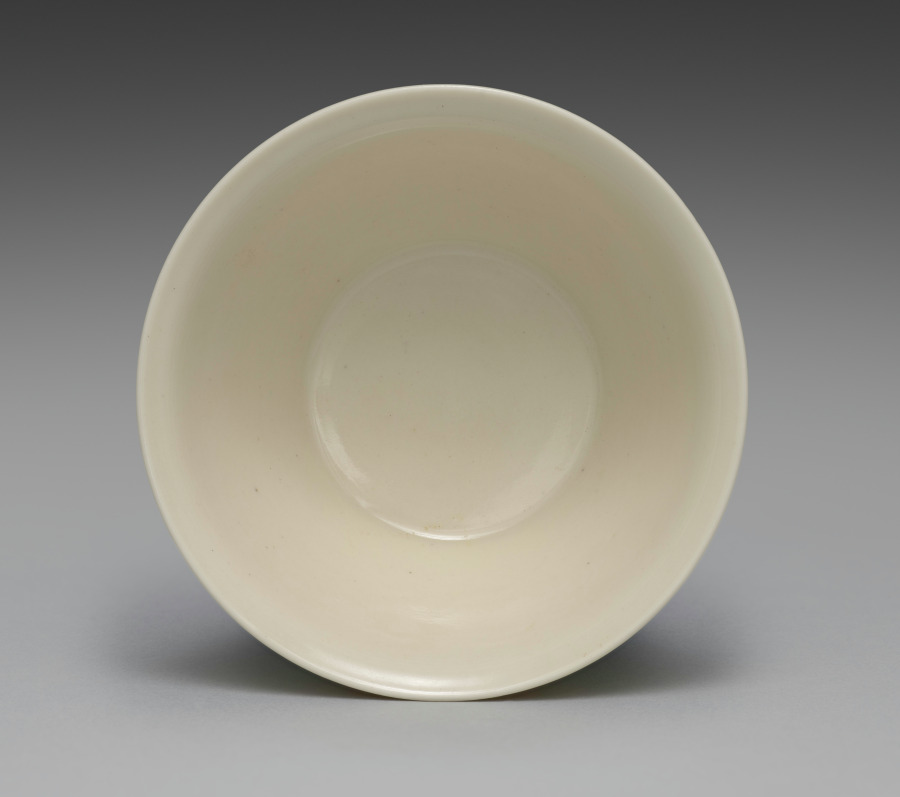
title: Teacup from Teacups with Floral Band Motif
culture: Japan, Meiji period (1868–1912)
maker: Seifū Yohei III (Japanese, 1851–1914)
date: 1893–1914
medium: One from a set of five cups; porcelain with incised decoration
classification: Ceramic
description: The five sencha teacups in this set are decorated with incised flowers and dots between a double band at the top and a single band at the bottom. They are in Yohei III’s creamy taihakuji body and glaze. In their motifs, they are quite similar to an incense burner by Yohei III (see CMA 2022.180), but the flowers are even more simple in design, with no open circle at the center. A label affixed to the side of the box refers to them as “sencha cups in emulation of Korean white [ware].” The reference to Korean ware indicates that even though Yohei was more directly inspired by Qing-dynasty wares from the Dehua kilns in Fujian Province in developing his porcelain clay and glaze for works such as these, the general understanding of the continental models still placed them, at least in terms of color, among pieces broadly associated in Japan with Korean white wares. The delicate cups are thinly potted, so they have a highly desirable translucency.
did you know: The delicate cups in this set are thinly potted, so they have a highly desirable translucency.